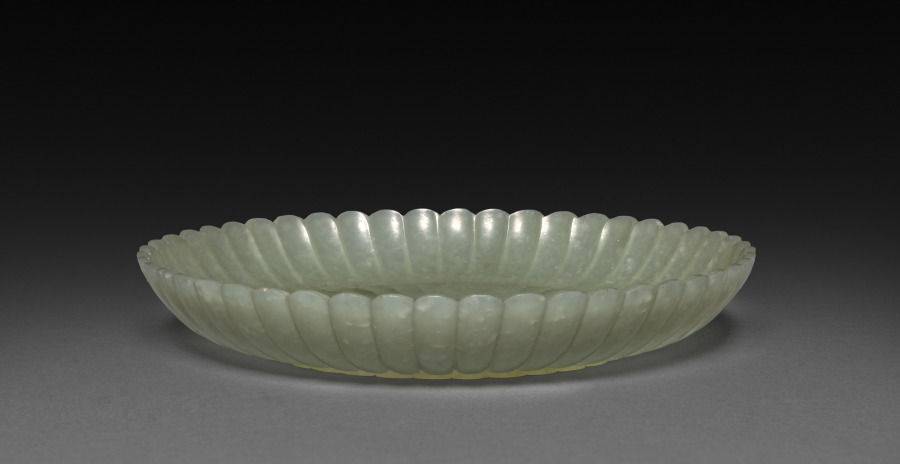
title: Plate in the Form of a Chrysanthemum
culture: China, Qing dynasty (1644-1911)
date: 1700s–1800s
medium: jade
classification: Jade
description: This light gray-green jade plate is carved on both sides into the shape of an open chrysanthemum. There are three tiers of concave petals and a central rondel of cross-hatched lines to indicate the pistils.